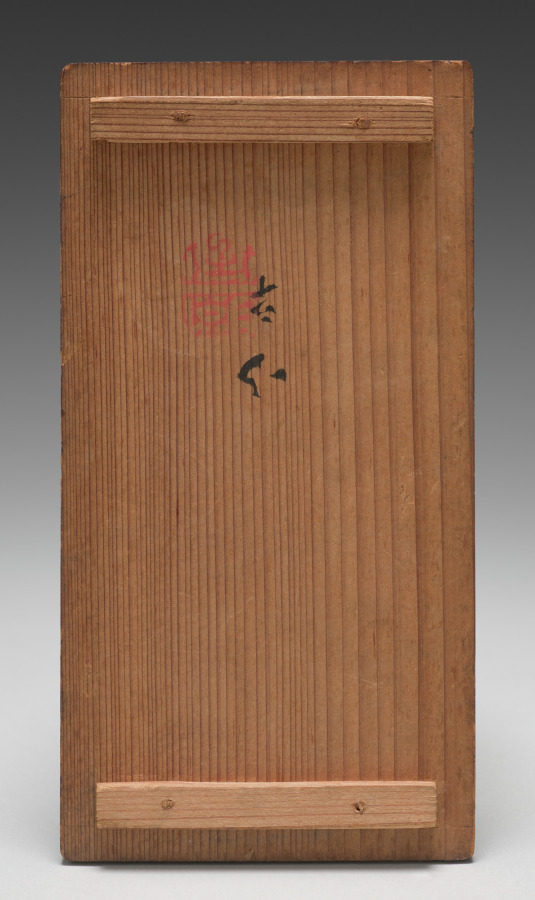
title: Sake Pourers with Bamboo and Bellflowers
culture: Japan, Edo period (1615–1868)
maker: attributed to Seifū Yohei I (Japanese, 1801–1861)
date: c. 1844–57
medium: pair of sake pourers; stoneware with white slip, underglaze blue and gold repair (kintsugi) (Kyoto ware)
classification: Ceramic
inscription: The storage box for the pair of vessels is inscribed and impressed with seals.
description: This pair of sake pourers adorned with with bamboo and bellflowers is attributed to the founder of the Seifū Studio, Seifū Yohei I (1801–1861). Yohei I, the lineage founder, was born to the Yasuda family in the city of Kanazawa, which faces the Sea of Japan. His home province of Kaga (in present-day Ishikawa Prefecture) produced its own ceramics, known as Kutani ware, but for his training as a potter, Yohei I chose Kyoto, which produced the more technically advanced porcelain ware. He moved to Kyoto around the 1820s and became apprenticed to Nin’ami Dohachi, a leading potter in the city. He later struck out on his own, and it is likely that his teacher gave him the name Seifu Yohei. His works include many exquisitely painted copies of Chinese porcelain, and he also produced stoneware with overglaze color enamels that emulated works in the style of Ogata Kenzan (1663–1743) at which his teacher excelled.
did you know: The two pourers are stored together in a bespoke box, which is inscribed and impressed with red seals.